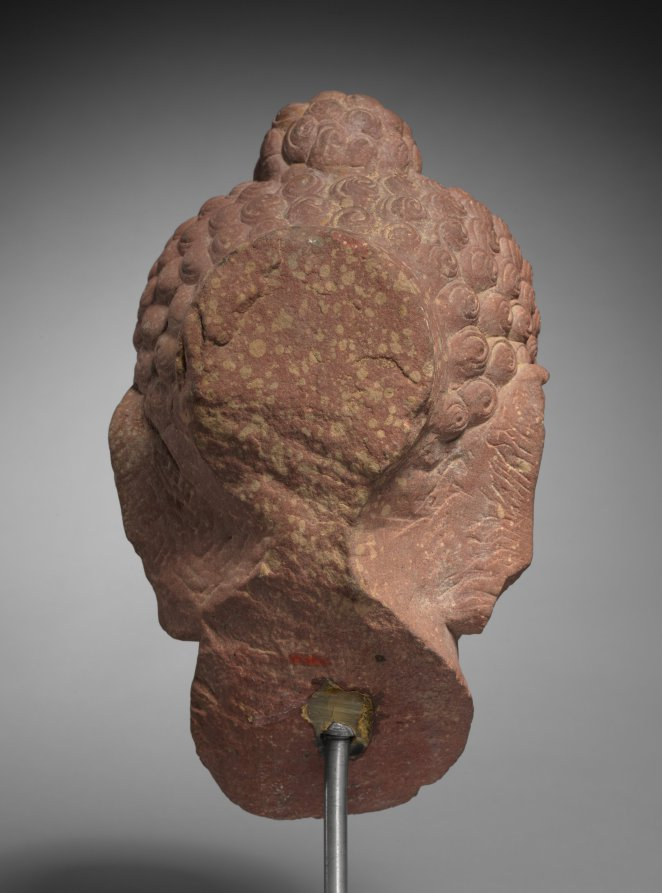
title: Head of Buddha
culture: Northern India, Uttar Pradesh, Mathura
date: 400s CE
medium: sandstone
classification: Sculpture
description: The brows arch with tension and alertness, though the lids are half closed. Short curls cover his head and cranial protuberance, which during this period came to be interpreted as a mark of one who has reached enlightenment, his state of awareness having surpassed the boundaries of an ordinary human being. Sculptors working during the time when kings of the Gupta dynasty (c. 319–550 CE) ruled northern India achieved a balance between fleshy volumes and idealized linear features. This balance led scholars to consider the Gupta period to be a “classical” age of Indian art.